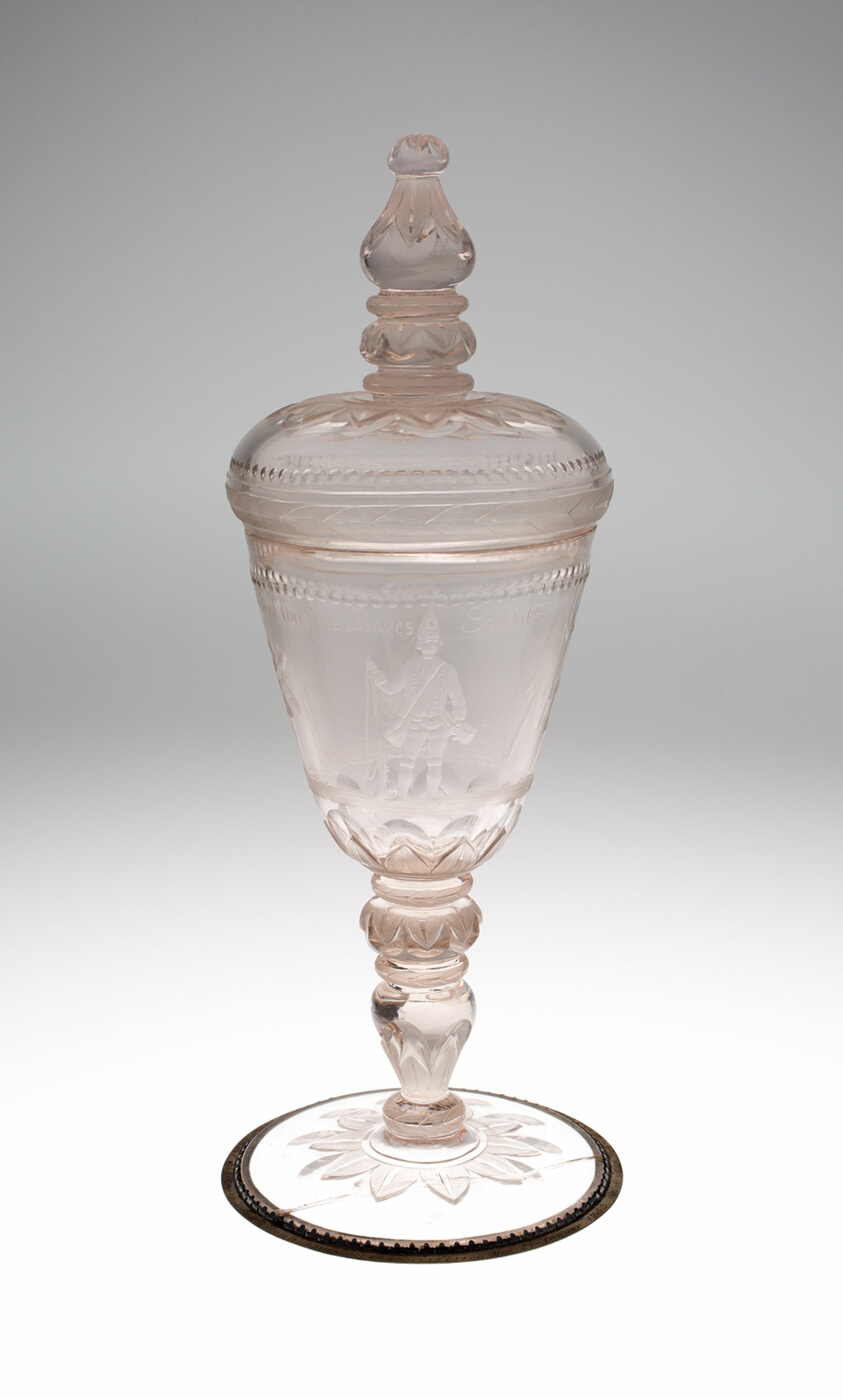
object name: Glass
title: Goblet with Cover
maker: Germany, Potsdam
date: c. 1700/20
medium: Glass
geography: Potsdam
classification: drinking vessel; glass; european decorative arts